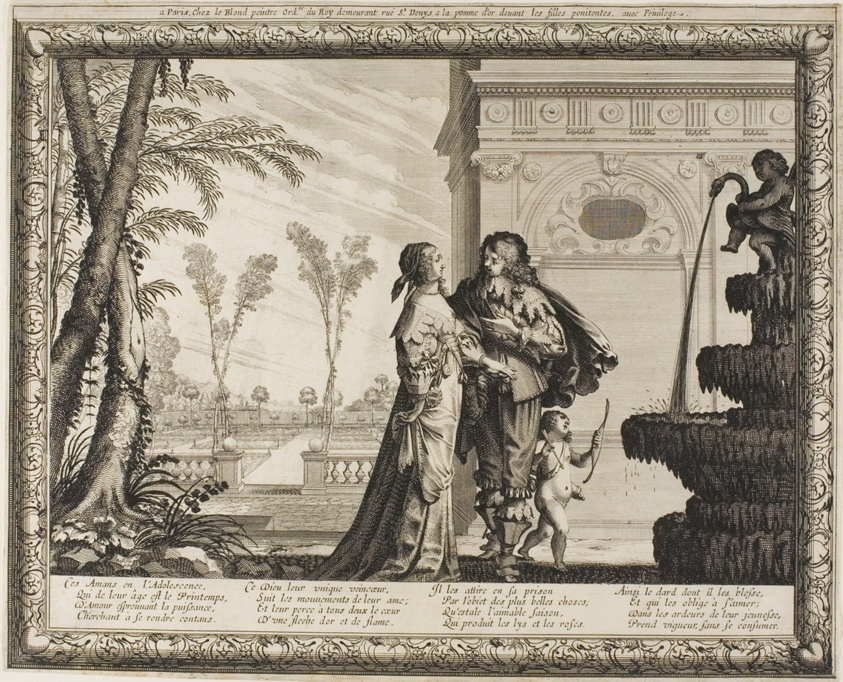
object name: Print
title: Youth, from The Four Ages of Man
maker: Abraham Bosse (French, 1602-1676)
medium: Etching on paper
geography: France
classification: etching; print; prints and drawing